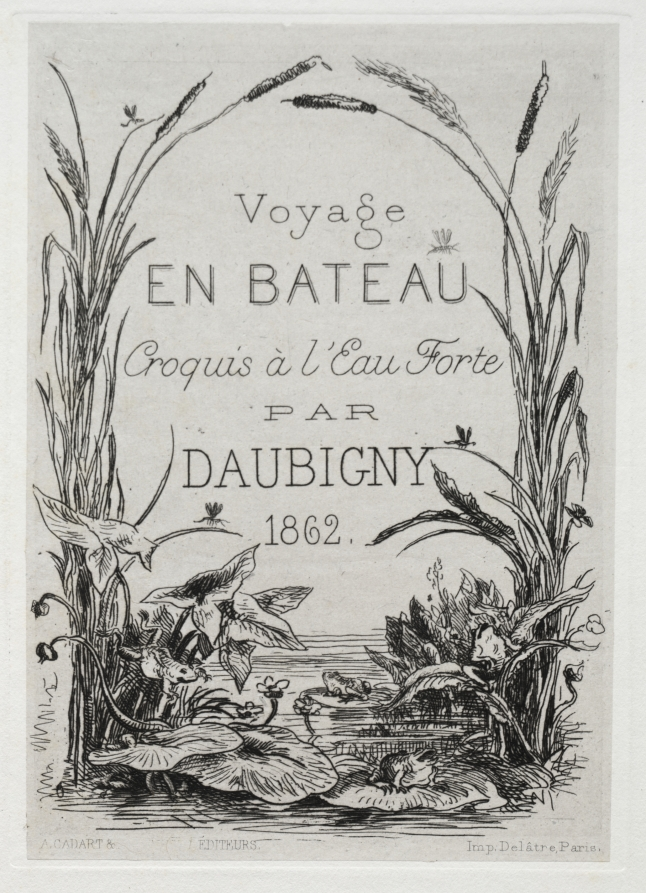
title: Title Frontispiece for the Album: The Boat Trip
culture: France, 19th century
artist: Charles François Daubigny (French, 1817–1878)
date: 1861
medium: etching with chine collé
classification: Portfolio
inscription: lower left corner, in graphite: L. D. III/III